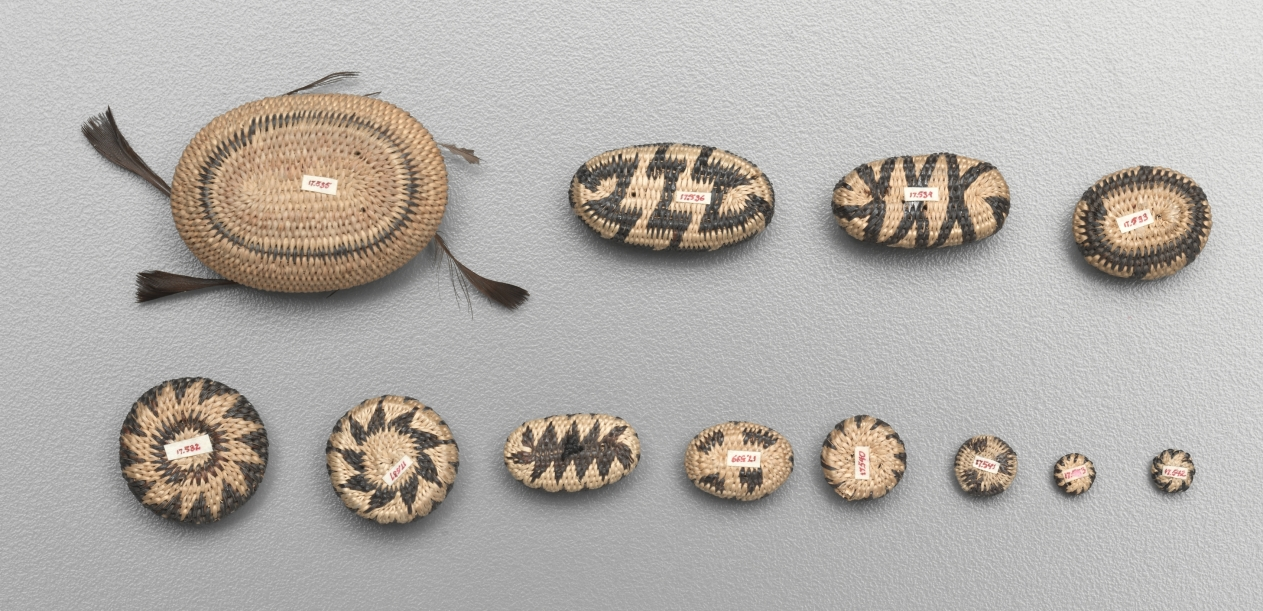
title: Miniature Rhomboidal Basket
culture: California, Pomo, 20th century (?)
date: Early 1900s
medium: coiled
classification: Basketry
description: Miniature baskets were made to demonstrate the basket-maker’s virtuoso skill, and these tiny marvels seem to be no exception—the smallest are just a few millimeters wide but still patterned. For such fine work, dexterity was required as much for preparation of materials as for weaving.